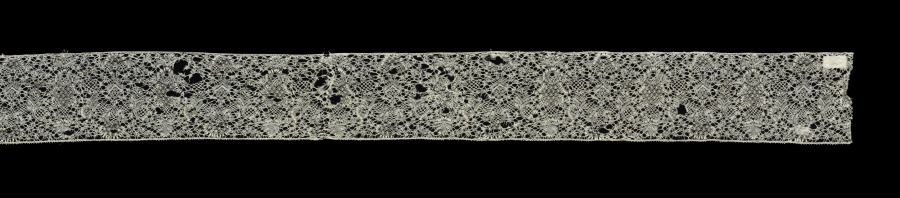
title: Lace Edging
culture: Belgium, Binche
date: 1700s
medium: Linen: bobbin lace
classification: Lace